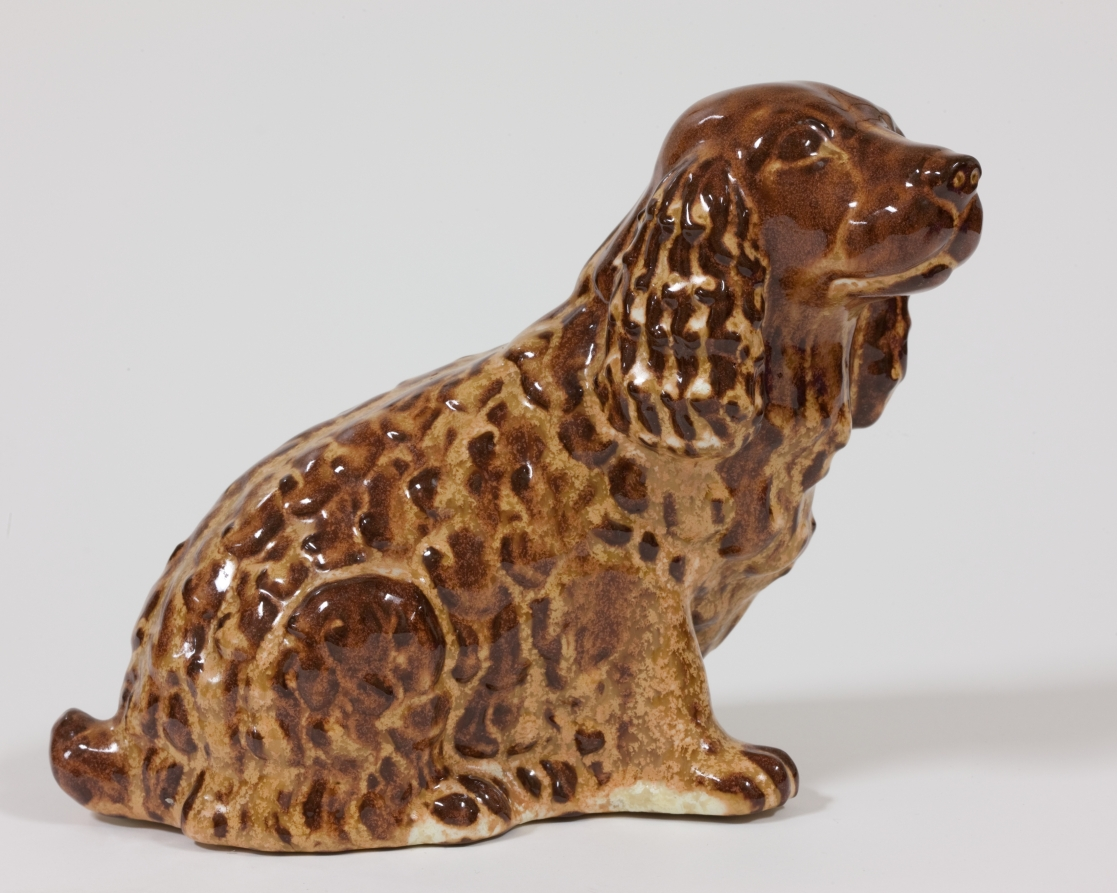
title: Spaniel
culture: America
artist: Chester Nicodemus (American, 1901–1990)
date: before 1942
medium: cast ceramic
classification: Ceramic